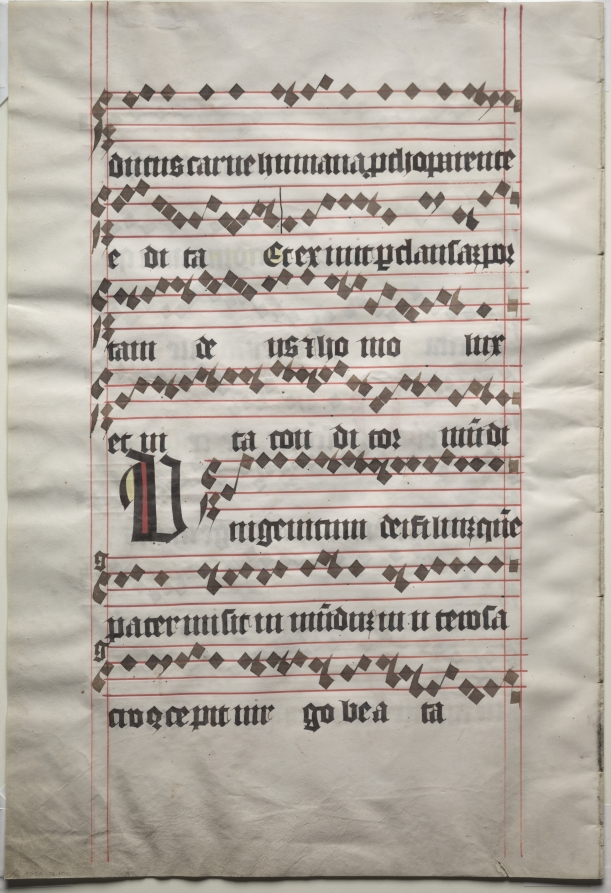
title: Bifolio from an Antiphonary: Historiated Initial O with the Nativity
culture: Bohemia, Prague, 15th century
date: early 1400s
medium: ink, tempera, and gold on parchment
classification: Manuscript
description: This splendid bifolium (a sheet folded in half to form two leaves) once formed part of an important antiphonary produced for an unidentified Benedictine monastery in Bohemia. With its rich illumination, it provides an important example of Bohemian painting during the opening years of the 15th century as well as painting in the city of Prague, one of the great court centers of Europe. The decoration of the leaf is dominated by a majestic initial O that depicts the Nativity. A scene in the background shows the angel Gabriel’s Annunciation to the Shepherds. The initial itself is placed within a square frame outside of which a single Benedictine monk observes the sacred event. The initial introduces the Latin chants for the first vespers of Christmas Day: O iuda et iherusalem (“Oh Judea and Jerusalem”). Framing the text are luxurious, scrolling acanthus leaves. Within the upper margin, two prophets emerge from the lush, foliated tendrils to observe the nativity below. In this way, the foretelling of the birth of Christ in the Old Testament is established visually.